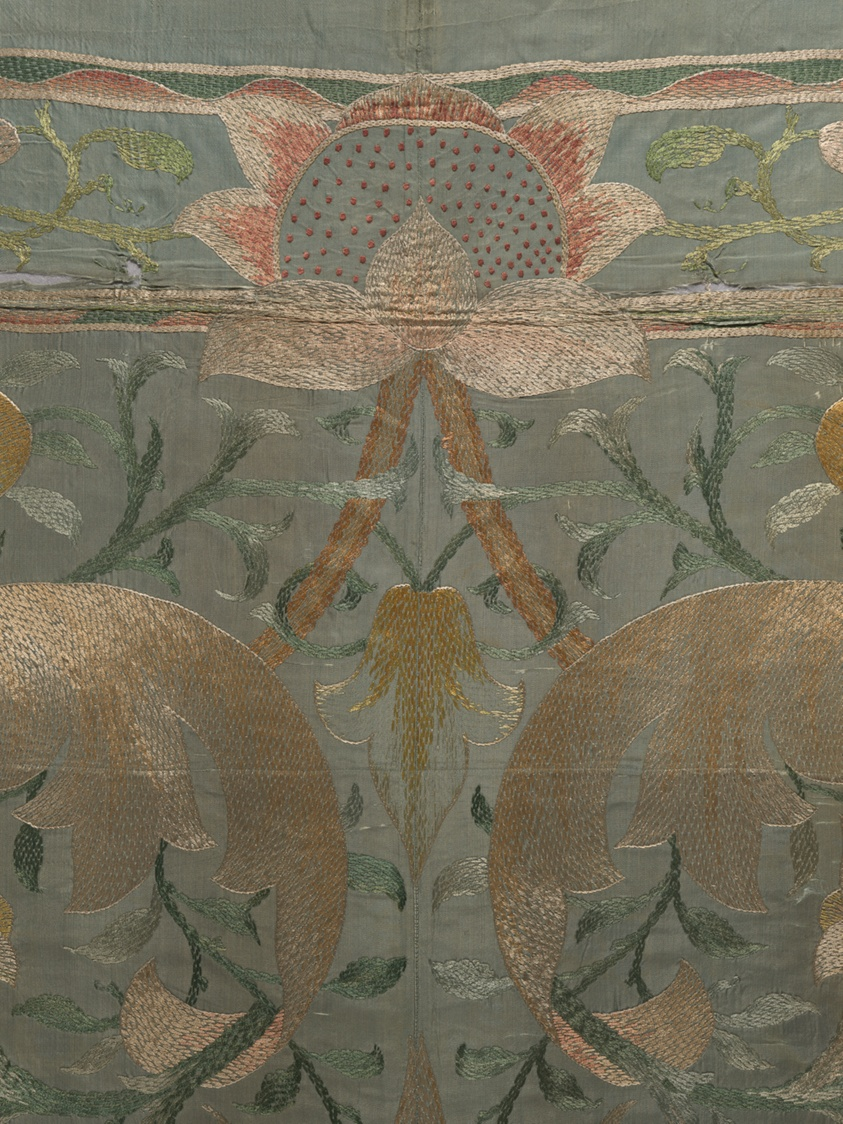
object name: Textile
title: Lotus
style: Arts and Crafts Movement, british, 19th century, British Arts and Crafts Movement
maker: Design attributed to May Morris (English, 1862–1938); Produced by Morris & Co., London (English, 1875–1940); Embroidered by the Decorative Arts Society, Chicago (American, founded 1877)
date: Design by 1888, made 1888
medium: Silk, warp-float faced twill weave; embroidered in satin and stem stitches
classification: textile; needlework (visual works)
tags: floral, lotus